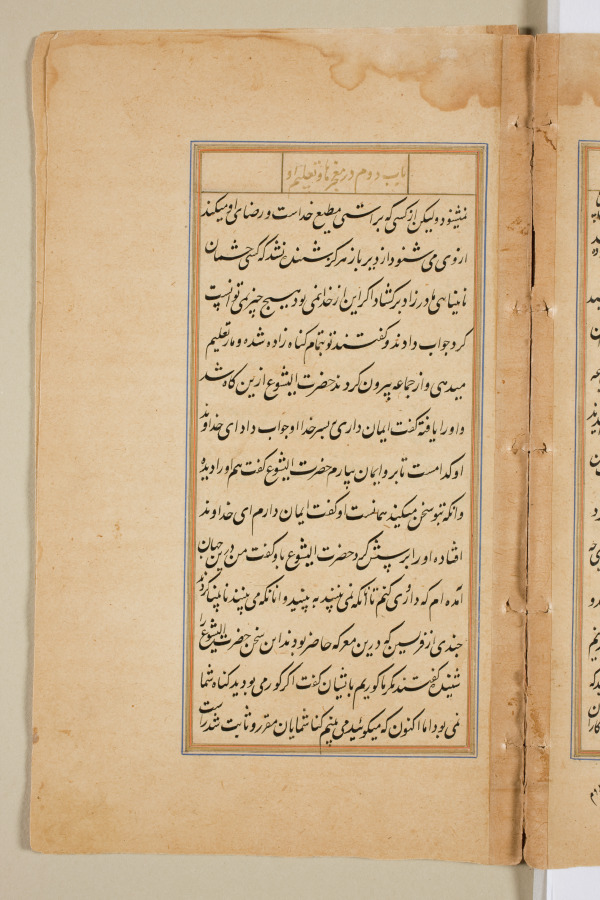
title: Text page from a Mirror of Holiness (Mir’at al-quds) of Father Jerome Xavier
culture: Mughal India, Allahabad, made for Prince Salim (1569–1627)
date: 1602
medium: Ink and gold on paper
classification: Manuscript